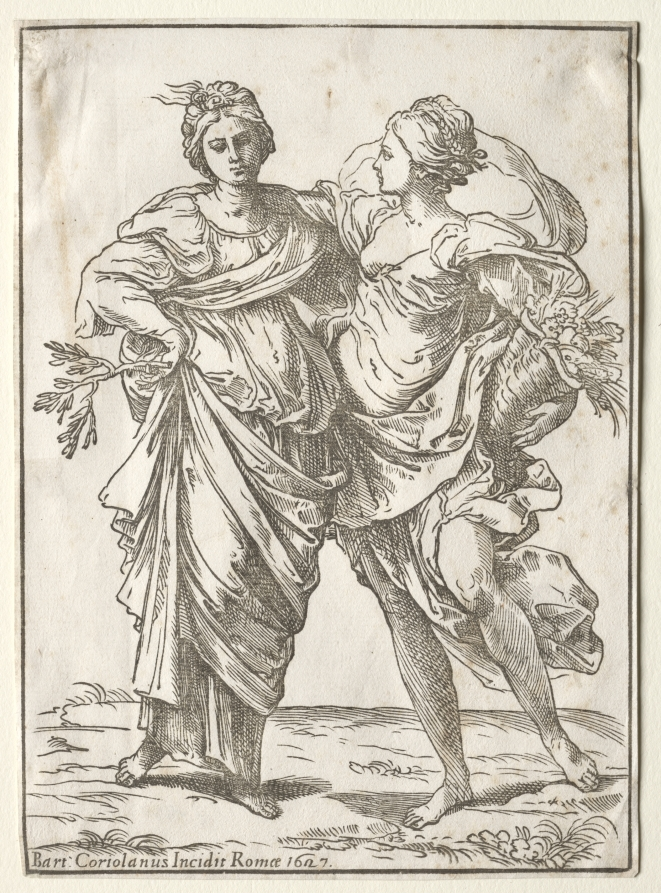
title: Alliance of Peace and Abundance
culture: Italy, 17th century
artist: Bartolommeo Coriolano (Italian)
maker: after Guido Reni (Italian, 1575–1642)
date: 1627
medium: woodcut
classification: Print